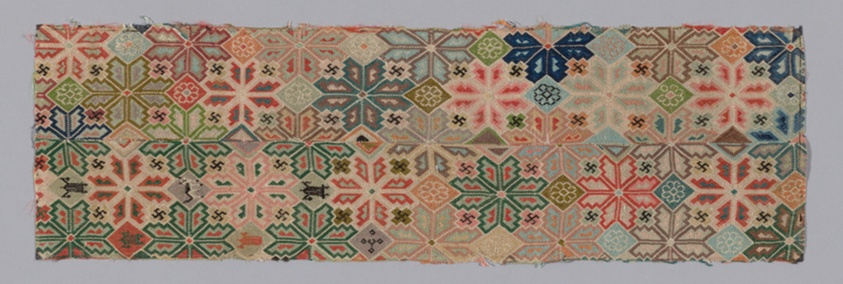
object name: Textile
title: Panel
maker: Han-Chinese (China)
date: Qing dynasty (1644–1911), 1875/1900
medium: Forty-four pairs and eight odd pieces of embroidered sleeve, ankle bands, etc. on gauze.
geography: China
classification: embroidery; textile